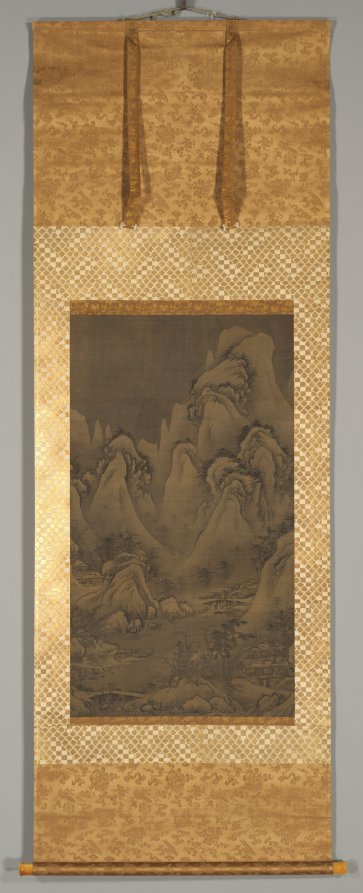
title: Winter Landscape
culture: Korea, Joseon dynasty (1392–1910)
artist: Yeoseol (Korean)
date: 1500s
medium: hanging scroll; ink and slight color on silk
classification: Painting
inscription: seal reading Nyosetsu in upper right corner.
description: This wintry vista is a vivid example of idealistic monumental painting: the strong contrasts of ink washes and contouring brush lines; the bold outlining of rock shapes and tree trunks; and the many short, twisting brushstrokes that build up the surfaces of the rocks. Much of the painting’s appeal can be attributed to the dynamic lines and contrasting tonal patterns that lead the viewer’s eye from the lower foreground toward the cold mountain peaks in the distance. In the corner is a seal that reads "Yeoseol," meaning "Snow-Like."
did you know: This wintry scenery was mainly painted in monochrome ink, but some details like the rider's horse saddle and the servant's carrier attest the use of light blue pigment.